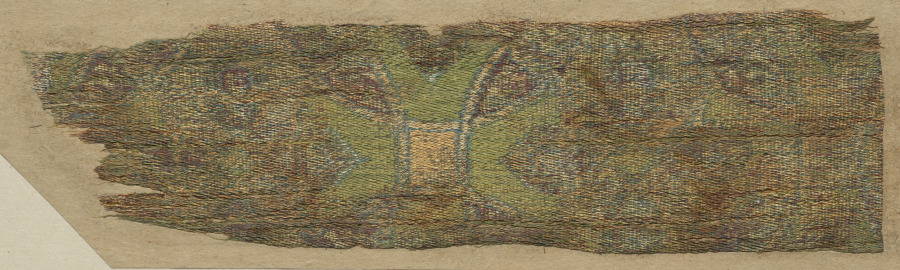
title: Fragment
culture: China or Japan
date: 700s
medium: compound twill weave, silk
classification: Textile